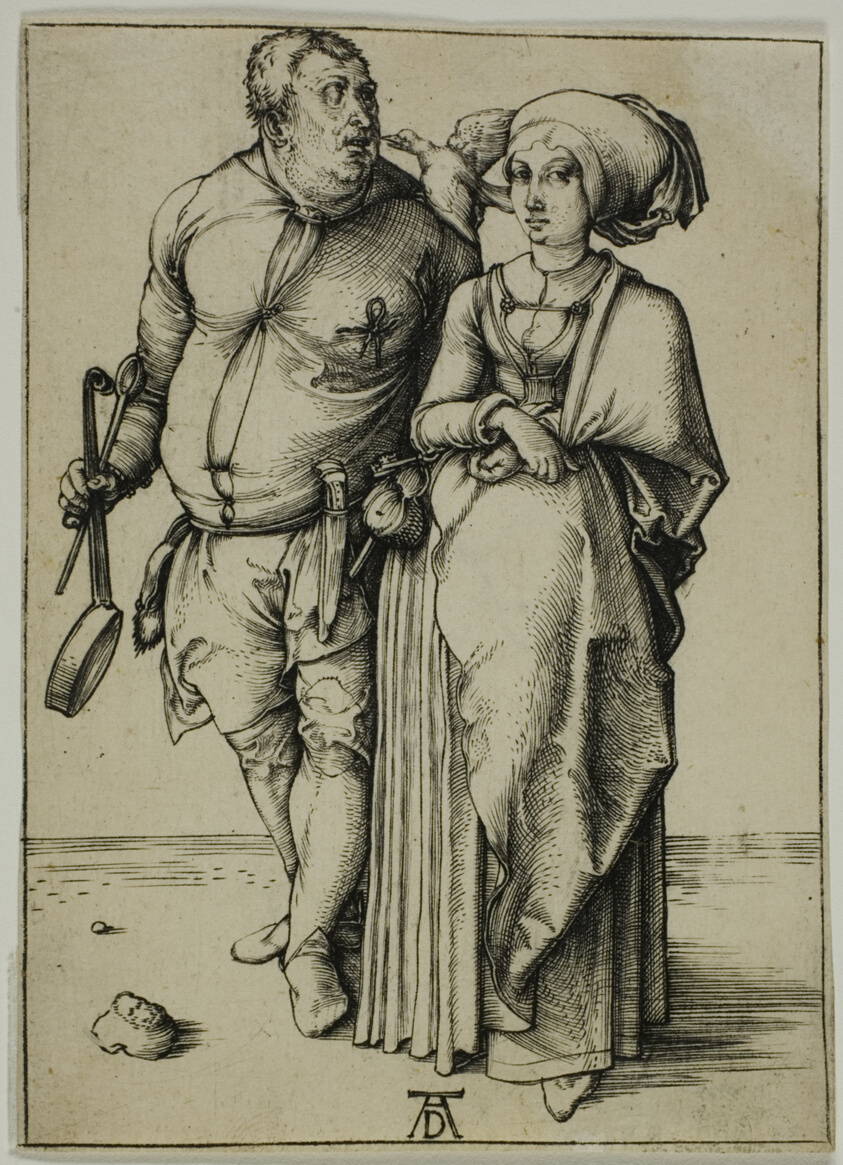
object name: Print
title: The Cook and his Wife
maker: Albrecht Dürer (German, 1471-1528)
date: c. 1497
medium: Engraving in black on ivory laid paper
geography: Germany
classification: engraving; print; prints and drawing; paper